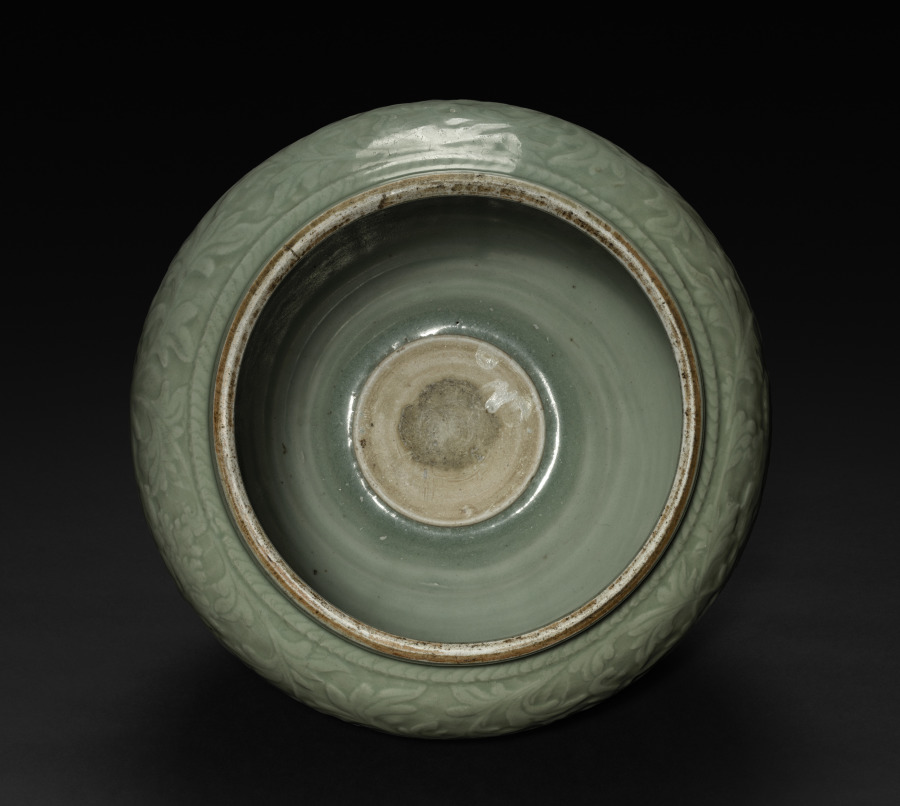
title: Jar: Celadon Ware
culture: China, Ming dynasty (1368–1644)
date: 1368–1644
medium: stoneware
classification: Ceramic